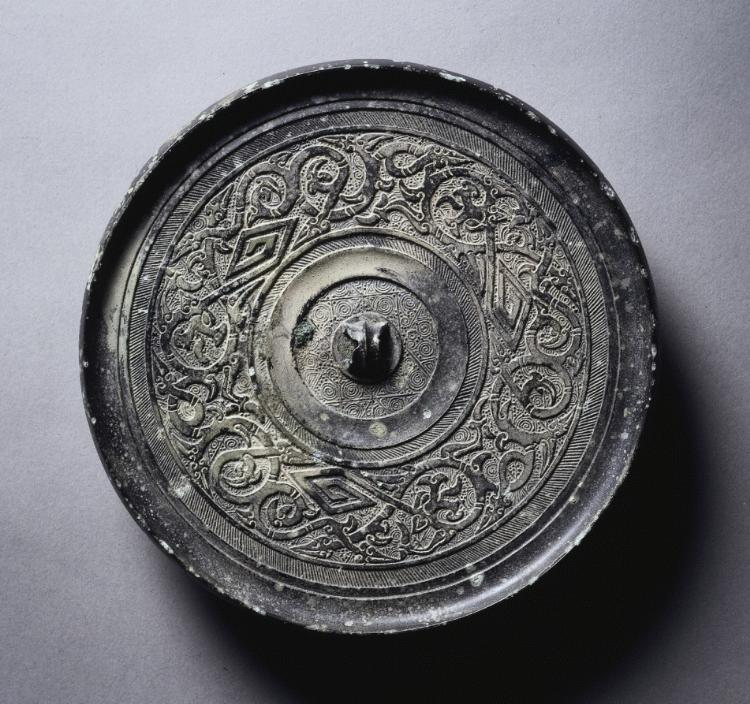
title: Mirror with Serpentine Interlaces and Angular Meanders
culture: China, Eastern Zhou dynasty (770–256 BCE), Warring States period (475–221 BCE)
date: 200s BCE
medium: bronze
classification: Metalwork